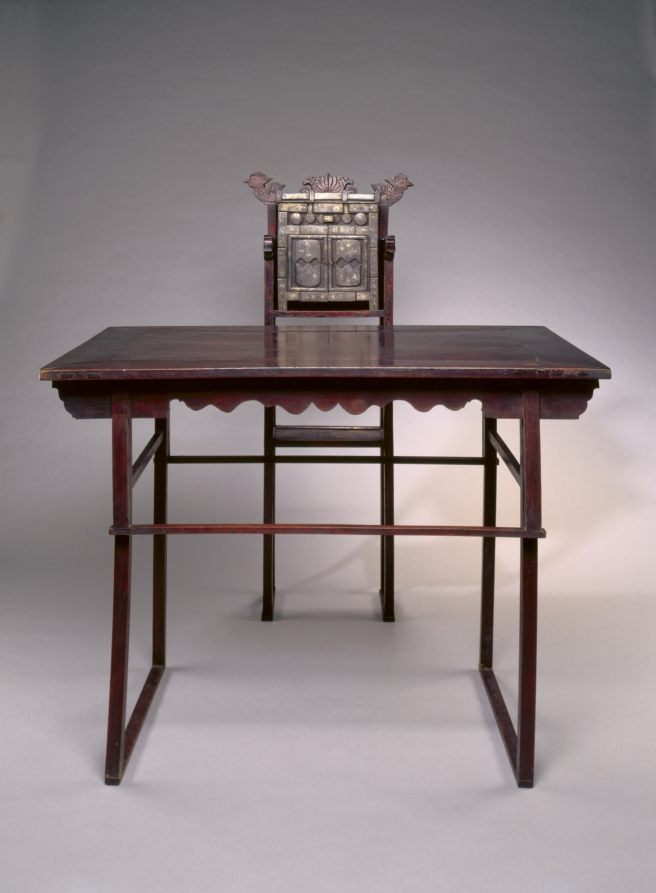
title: Spirit House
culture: Korea, Joseon dynasty (1392–1910)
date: late 1800s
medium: iron inlaid with silver and copper decoration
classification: Metalwork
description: This table, chair, and spirit house form a partial recreation of a memorial altar from the Joseon period. The spirit house and chair both include a number of auspicious symbols, including lotuses, conch shells, and chakra wheels. The spirit house would have been placed on the altar chair, and offerings would have been set out on the table for the memorial service. In ancestor veneration rituals, deceased parents or ancestors are sanctified as spirits who are believed to oversee their descendents. Three times a year, once at the lunar new year, once at the person’s death date, and once at the time of the mid-autumn festival, food would be placed on the table for the ancestors, including fruits, rice, meat, and rice wine. During these ceremonies the worshippers’ attitude was as reverential toward the objects meant to embody the ancestors’ spirits as that toward a living parent.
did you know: The belief in two types of souls, the spiritual and the corporeal, embodied the core concept of ancestor worship in traditional China and Korea. While the corporeal soul is believed to reside in the tomb, the spiritual soul, in the spirit house like this example, guards his or her decedents.